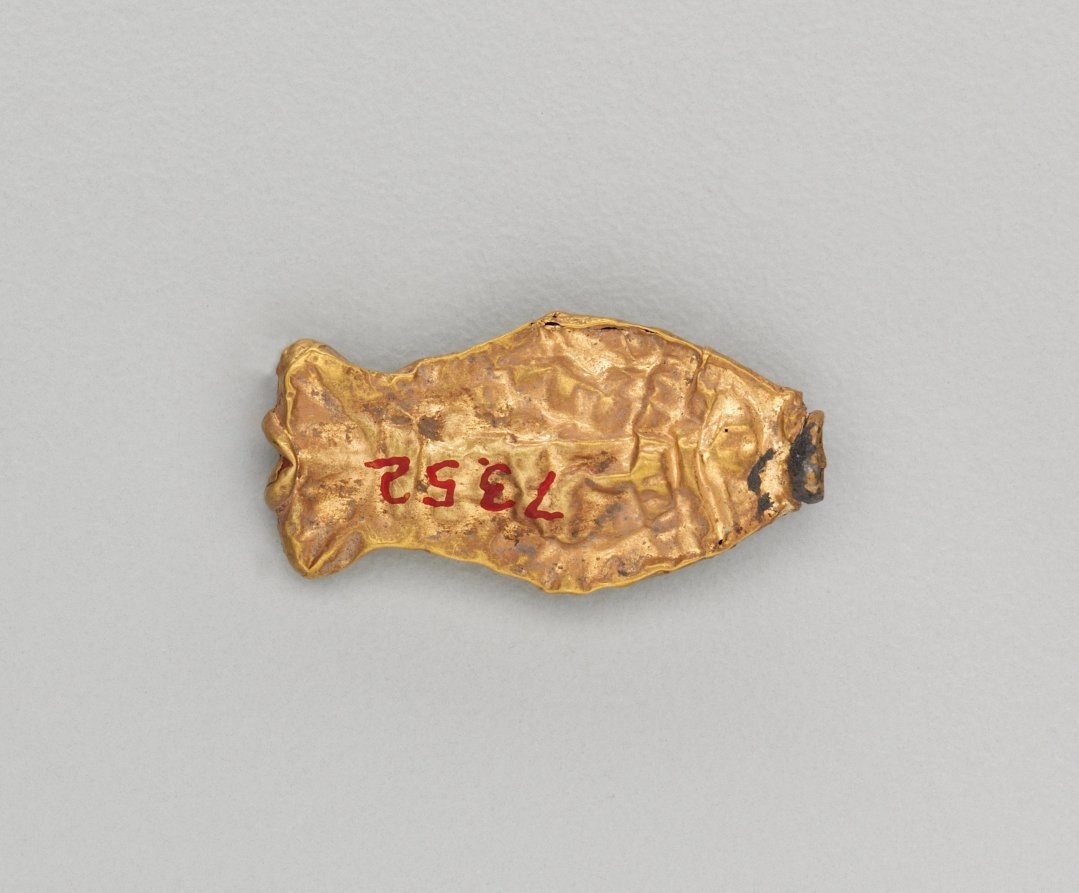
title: Necklace Bead in the Form of a Fish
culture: India, Shunga period (185–78 BCE)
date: 185–72 BCE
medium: gold repoussé with granulation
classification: Jewelry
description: Jewelry in ancient India often consisted of elements associated with water, such as fish and other aquatic plants and animals. Since water is essential for life, imagery that connotes water is life-affirming, or auspicious, and therefore appropriate adornment.